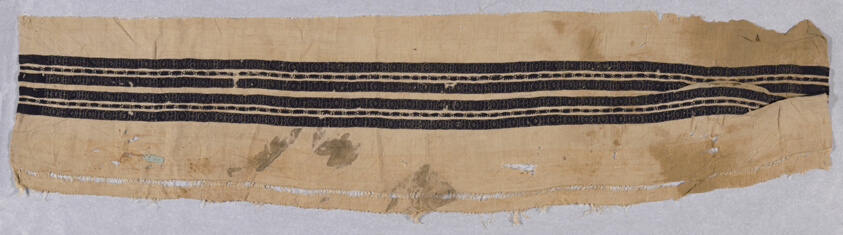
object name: Textile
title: Fragment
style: roman period (egyptian), coptic (period)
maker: Egypt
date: Roman period (30 B.C.– 641 A.D.)/Arab period (641–969)/Fatimid period (969–1171), 3rd/ 10th century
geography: Egypt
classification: textile; weaving